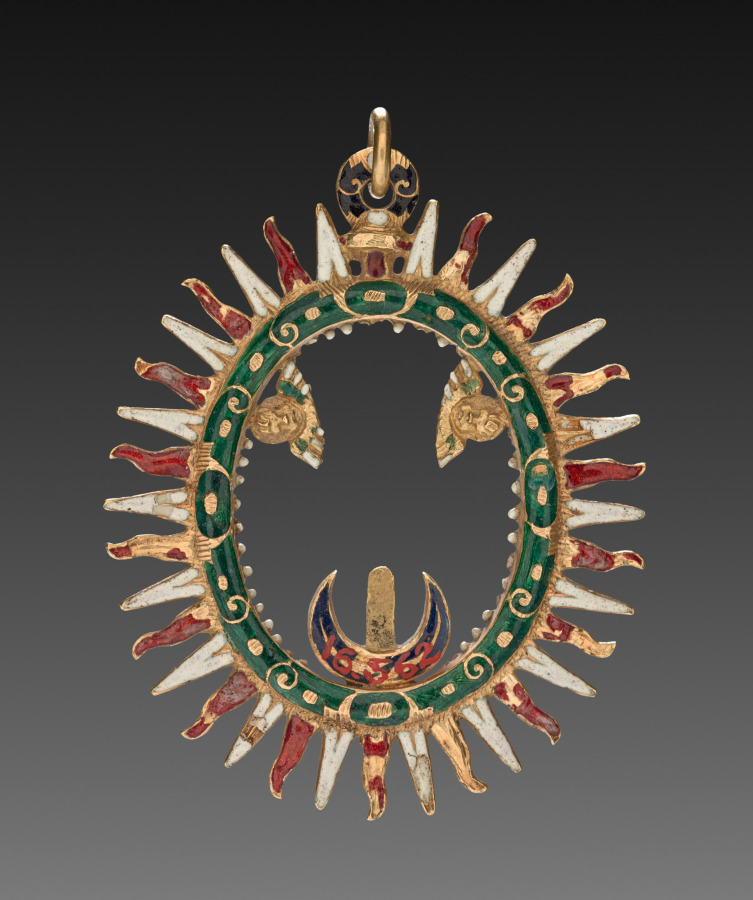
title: Pendant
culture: Spain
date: 1500s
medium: gold and enamel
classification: Jewelry